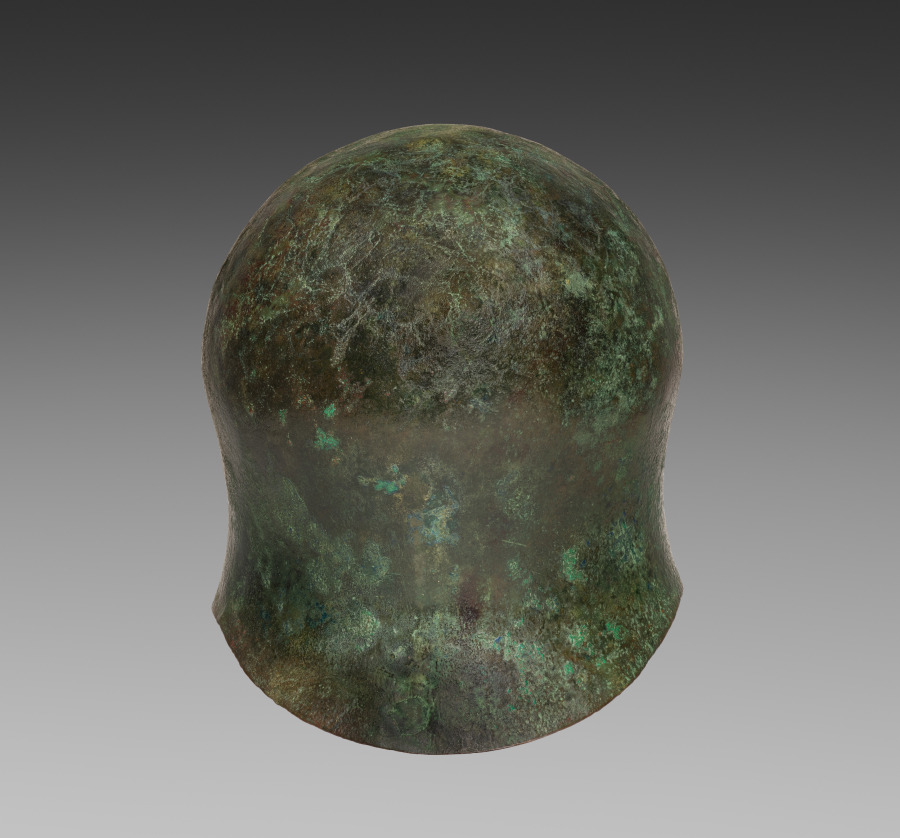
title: Corinthian Helmet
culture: Greek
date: c. 625–550 BCE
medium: Bronze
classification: Arms and Armor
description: This remarkably well-preserved bronze helmet belongs to an iconic type known as Corinthian yet produced far beyond the city of Corinth. Designed for use by hoplite warriors, who fought with spears and shields in shoulder-to-shoulder (phalanx) formation, such helmets provide maximum protection but limited vision, hearing, and movement. Probably first cast and then hammered into its final shape, the helmet features both gentle curves and sharp angles, evoking the head and face that it protected. Similar helmets appear frequently on warriors shown in ancient art, though often with crests of horsehair or other organic materials that no longer survive.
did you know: A small hole above the rear neckline, now repaired, may reflect a fatal blow.